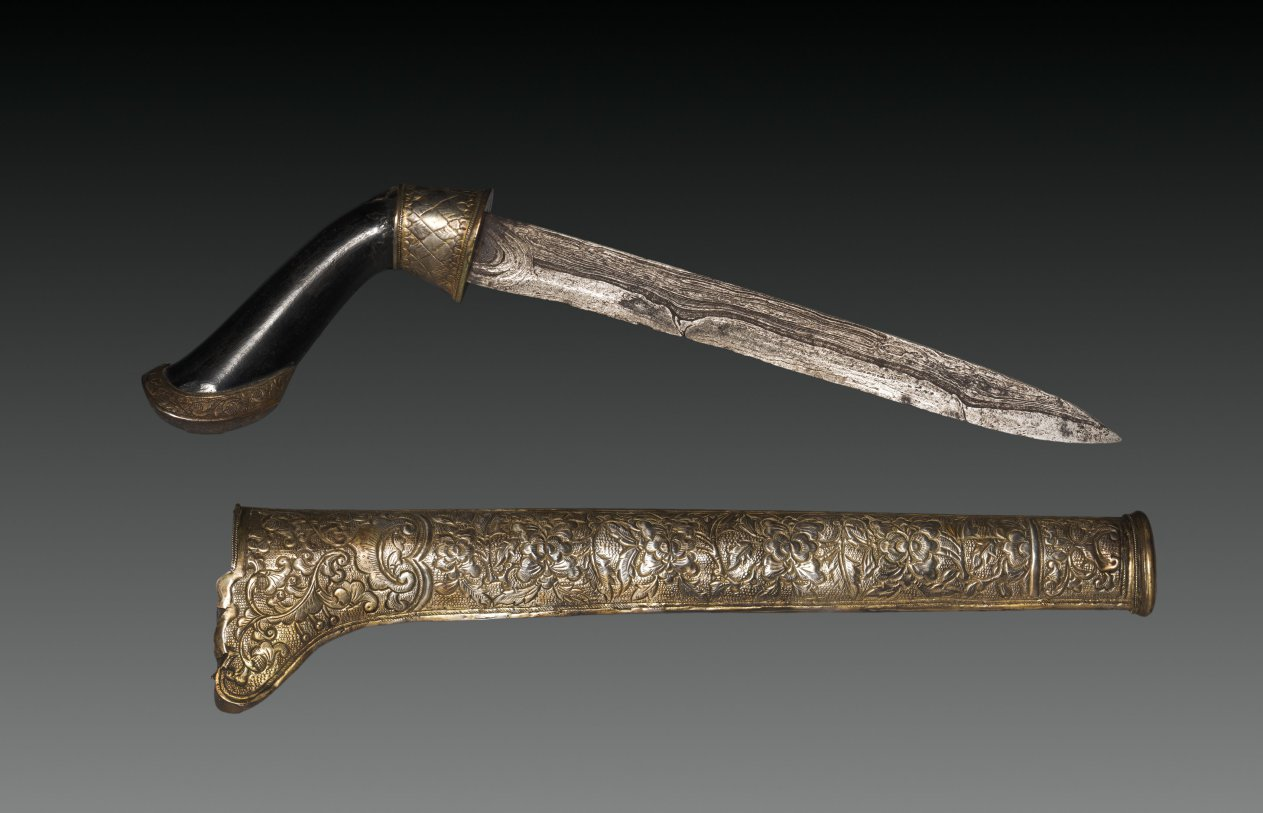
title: Knife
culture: Sumatra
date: 1500s–1800s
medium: Blade: damascened steel; handle: wood, bronze, and gilt silver fittings; scabbard: gilt silver with wood core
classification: Arms and Armor